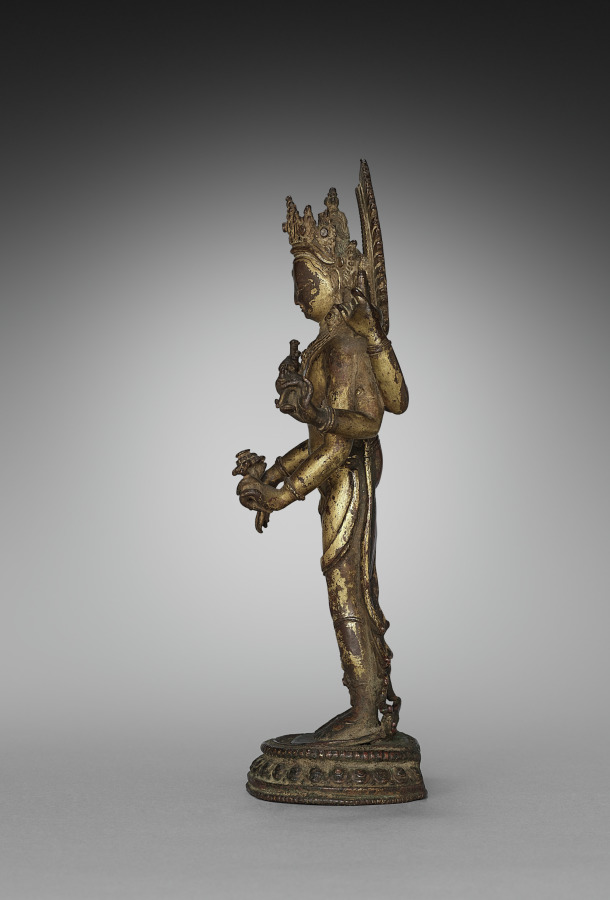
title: Lokeshvara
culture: Nepal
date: 1300s–1400s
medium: gilded copper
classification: Sculpture